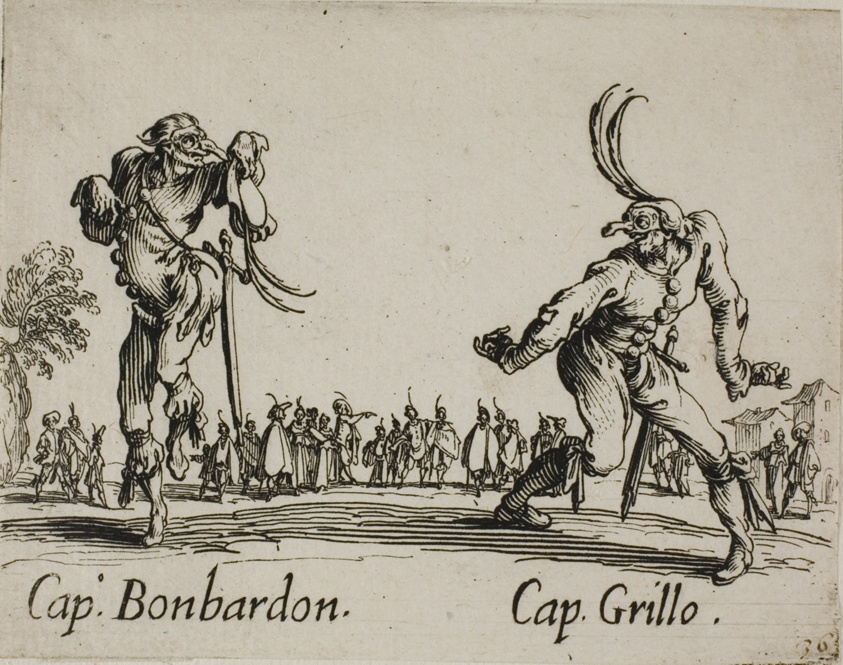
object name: Print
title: Capitano Bonbardon - Capitano Grillo, plate 13 from Balli di Sfessania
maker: Jacques Callot (French, 1592-1635)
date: c. 1622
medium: Etching and engraving on paper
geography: France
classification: etching; print; prints and drawing